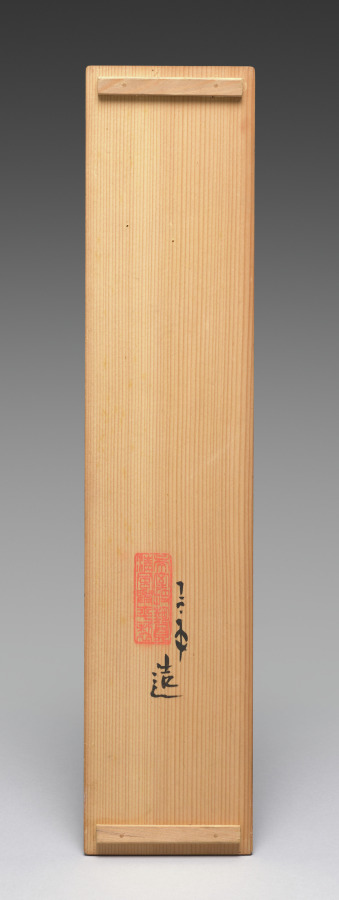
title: Tea Set with Orchids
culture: Japan, Meiji period (1868–1912)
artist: Seifū Yohei III (Japanese, 1851–1914)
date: c. 1893–1914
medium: Teapot with set of five teacups; porcelain with underglaze blue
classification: Ceramic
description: Although the teapot here is stored in a separate box from the five cups, these six pieces may once have been part of a tea set that included other tools such as a water cooler. The teacups have orchid flowers on both sides in underglaze blue, as well as a blue band inside the footring. The teapot has the same design and a blue band painted around the bottom of the lid’s knob. The cups’ long wood storage box is stamped on the exterior, over the lid and base, with a small red seal reading “Satō.” The same seal appears on five small squares of yellow textile, one placed in the bottom of each compartment in the teacup storage box. These are additional to the customary yellow cloths stamped with a “Seifu” seal. Interestingly, four of the Seifū cloths are stamped with an ovoid seal, while the remaining cloth, which is a slightly lighter color, has an unusual seal that is not quite gourd-shaped and with the fū of Seifū in a stylized, unrecognizable form. The teapot has its own box with a Satō seal and is wrapped with an orange textile stamped with the same unusual Seifū seal. A set with a very similar surface design is in the Brooklyn Museum. The Brooklyn set has a water cooler and a small pitcher, in addition to the teapot and cups, and all are in a single storage box. This box records the tea tools as made with kanpakuji, or “bright-jewel white porcelain,” counted among Yohei III’s most important inventions, and carved images. In fact, both sets have a white surface much closer in coloration to the cool white of porcelain clay used in Kyoto at the time, and the designs are simply painted. The Brooklyn set was thus likely mismatched at some point with a box intended for another tea set. Nonetheless, the box may have helped prevent the set’s original components from being dispersed, and the set itself provides insight into how the other tools from the present set may have looked.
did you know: This tea set with orchids has a side-handled pot called a kyūsu, used for steeping, straining, and serving tea.